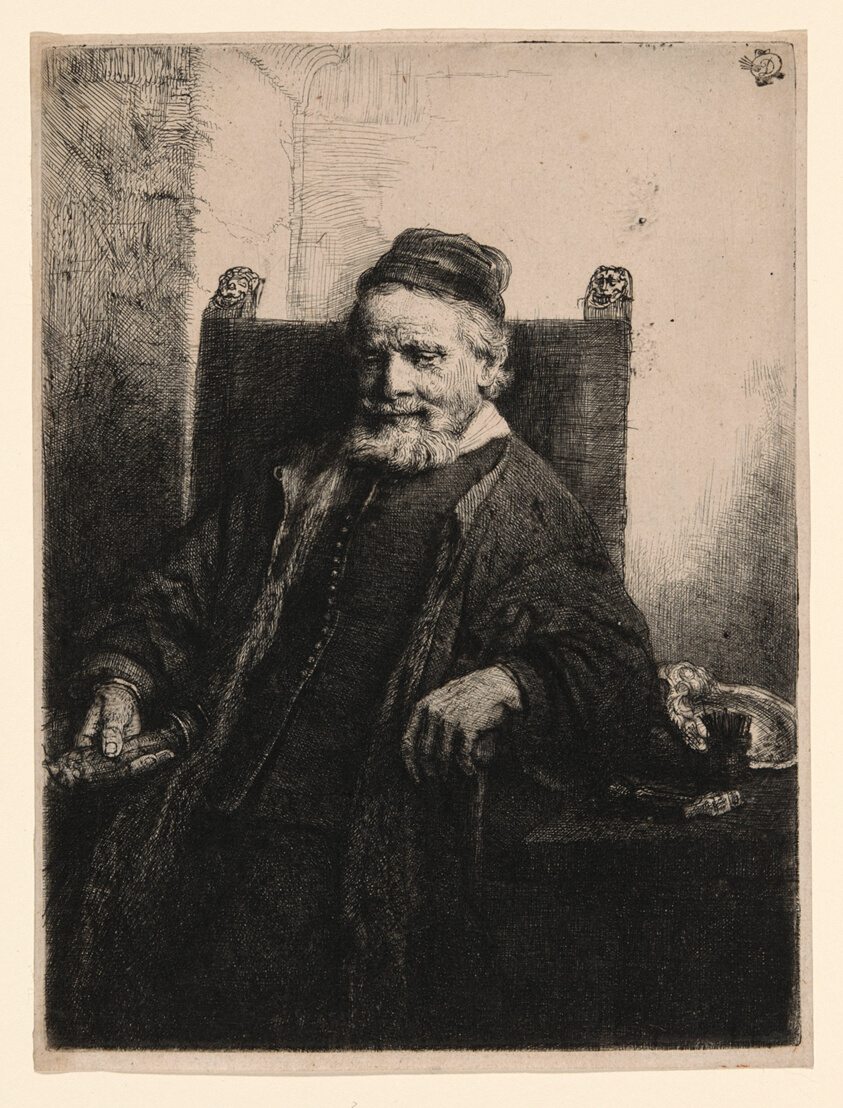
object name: Print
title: Jan Lutma, Goldsmith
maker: Rembrandt van Rijn (Dutch, 1606-1669)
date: 1656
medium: Etching and drypoint in black on buff laid paper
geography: Holland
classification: etching; drypoint; print; prints and drawing; paper